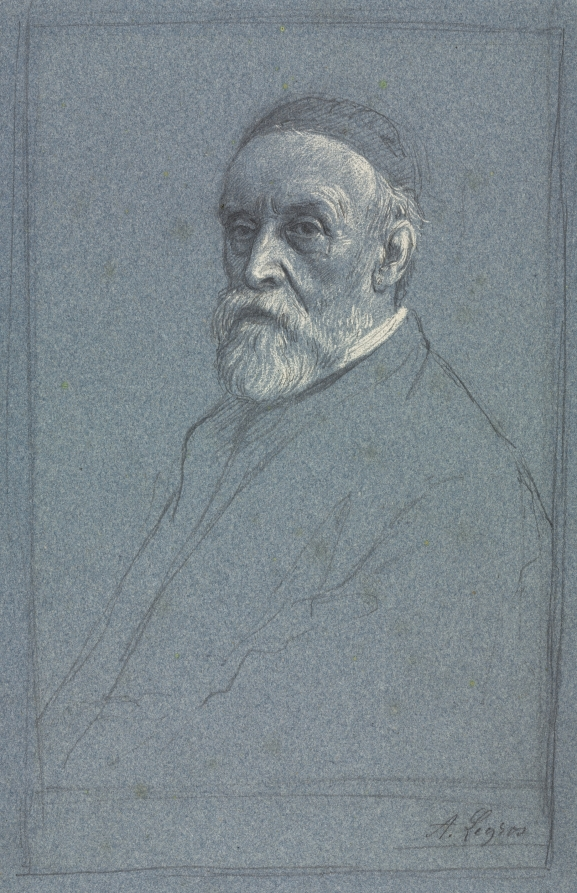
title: George Frederic Watts, R.A.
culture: France, 19th century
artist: Alphonse Legros (French, 1837–1911)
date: c. 1876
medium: graphite heightened with white chalk; framing lines in black chalk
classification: Drawing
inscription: signed, lower right, in graphite: A. Legros [underlined]